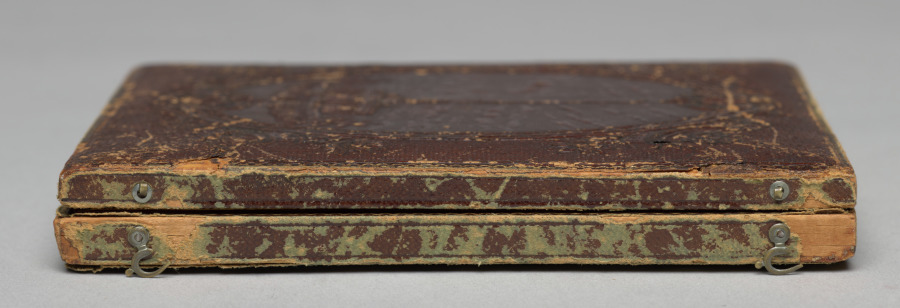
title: Buggy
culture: America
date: c. 1853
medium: daguerreotype, half-plate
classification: Photograph